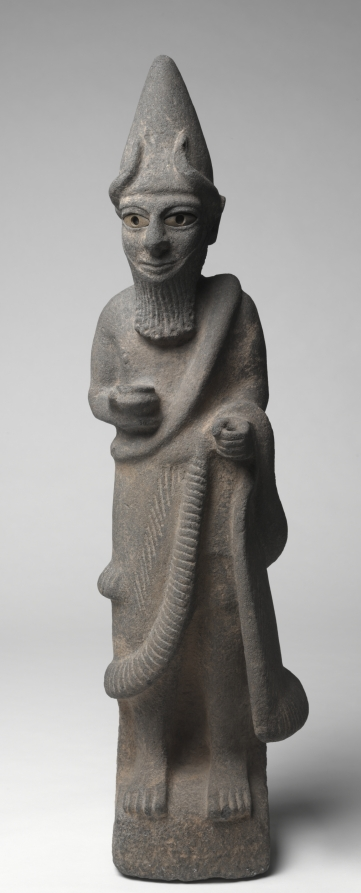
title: Priest-King or Deity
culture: Hittite, North Syria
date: c. 1600 BCE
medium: basalt with bone eyes (left, ancient; right, restored)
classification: Sculpture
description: The Hittites migrated into Anatolia in the 3rd millennium BCE and spoke an Indo-European language, a group that includes Greek, Latin, Persian, Sanskrit, English, and most modern European languages. They were the first ancient people to use iron for weapons. From about 1600–1200 BCE their empire was at its peak, extending from central Anatolia to Syria, and south along the eastern Mediterranean. Their vast empire and interest in commerce enabled the Hittites to spread Mesopotamian ideas and culture throughout the ancient Mediterranean world. This large basalt sculpture is exceptionally rare in depicting a Hittite god or priest-king wearing a horned conical crown, false beard, and long robe. He holds a bowl in his right hand and once held something in his left, perhaps a staff or sword.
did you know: The left eye of the sculpture is the original bone inlay while the right eye is a modern restoration done after the piece was damaged.